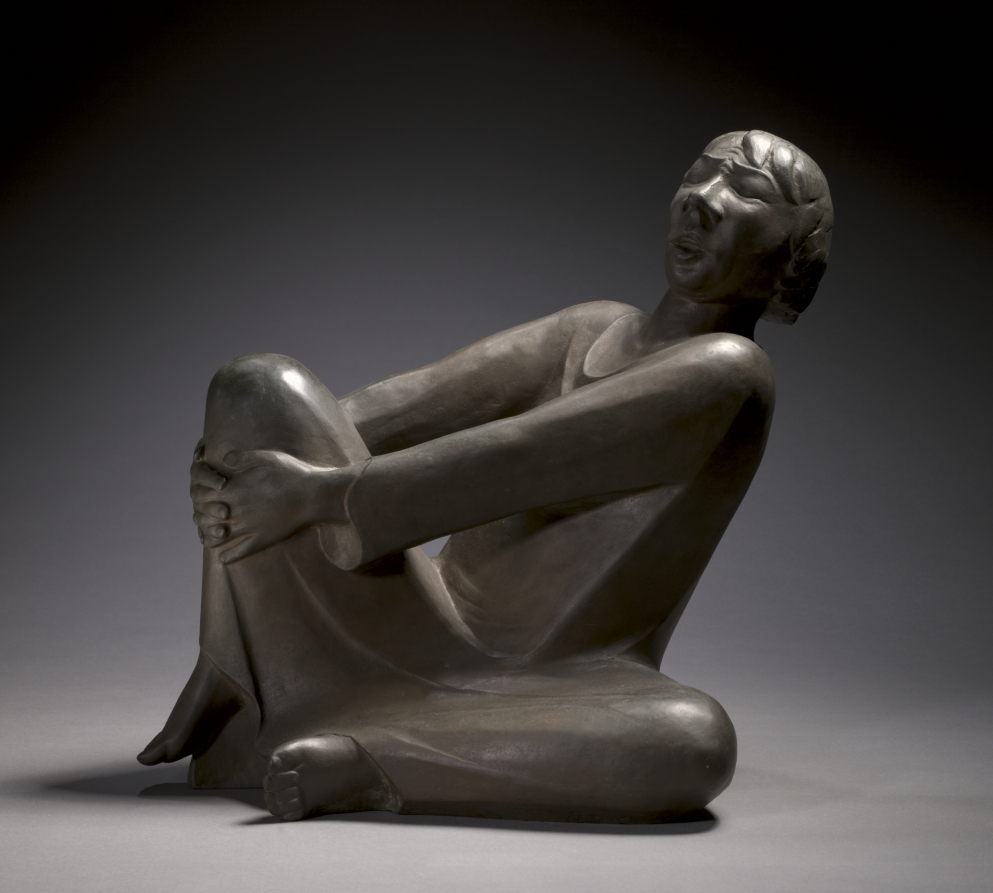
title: Singing Man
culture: Germany, 20th century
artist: Ernst Barlach (German, 1870–1938)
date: 1928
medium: bronze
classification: Sculpture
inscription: Signed on support under right foot: "E. Barlach"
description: One of the most celebrated sculptors of the Expressionist movement in Germany, Barlach first began exploring ways to convey inner feeling through depictions of the human body around 1906. As this singing man pulls his knee toward his body, his closed eyes and open mouth suggest deep concentration. A staunch opponent of the Nazis, Barlach was declared a “degenerate artist” and forbidden to teach or exhibit in Germany.